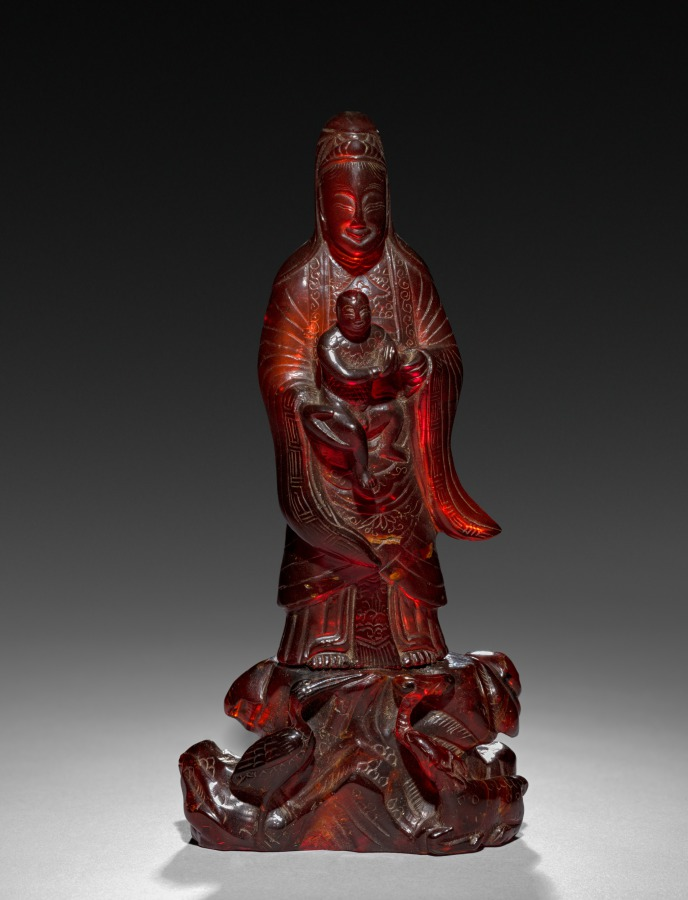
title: Guanyin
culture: China, Qing dynasty (1644-1911)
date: 18th Century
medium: amber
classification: Stone